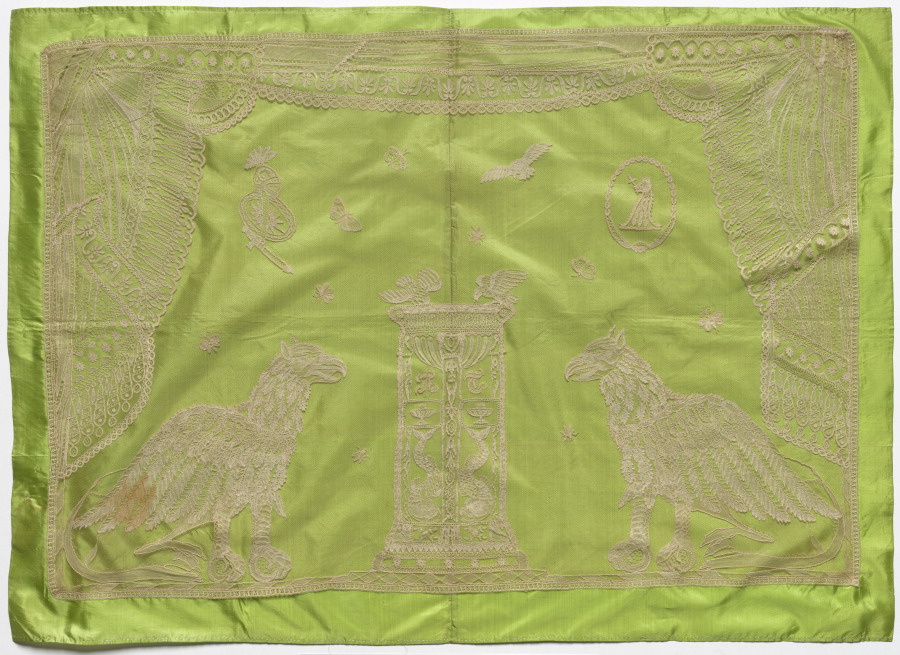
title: Lace Panel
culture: Belgium, Brussels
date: early 1800s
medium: point plait appliqué bobbin lace on machine-made net; separately applied machine-made lace edging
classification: Lace